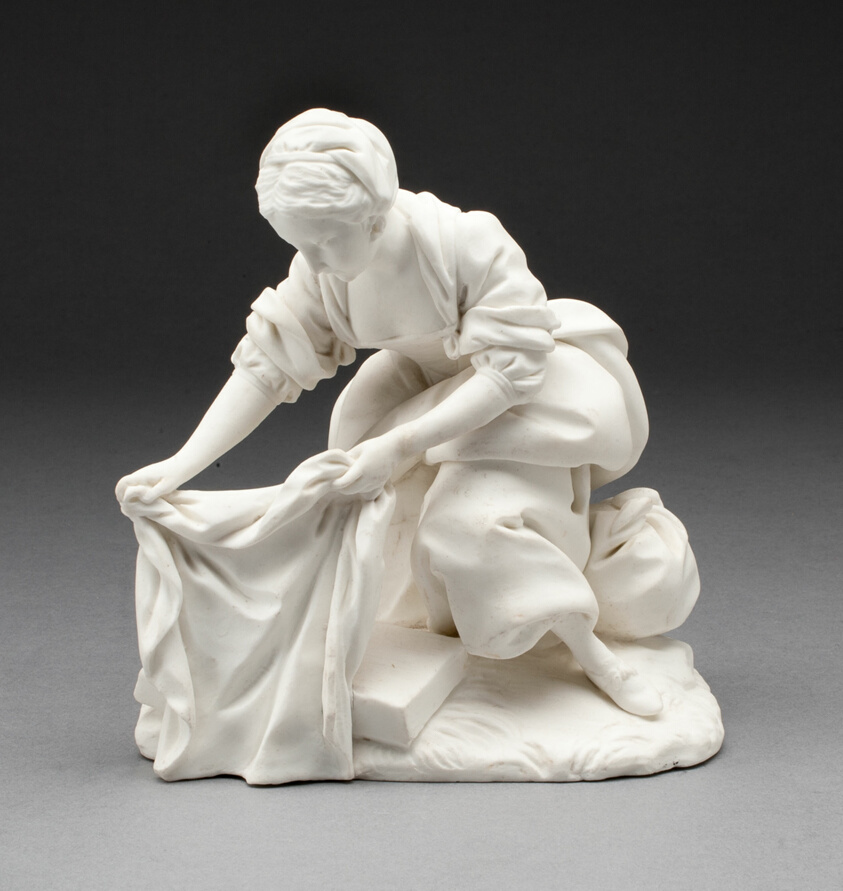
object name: Ceramics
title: Woman Washing Clothes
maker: Sèvres Porcelain Manufactory; French, founded 1740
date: c. 1755-60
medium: Unglazed soft-paste porcelain (biscuit)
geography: Sèvres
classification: sculpture; ceramics; porcelain; european decorative arts